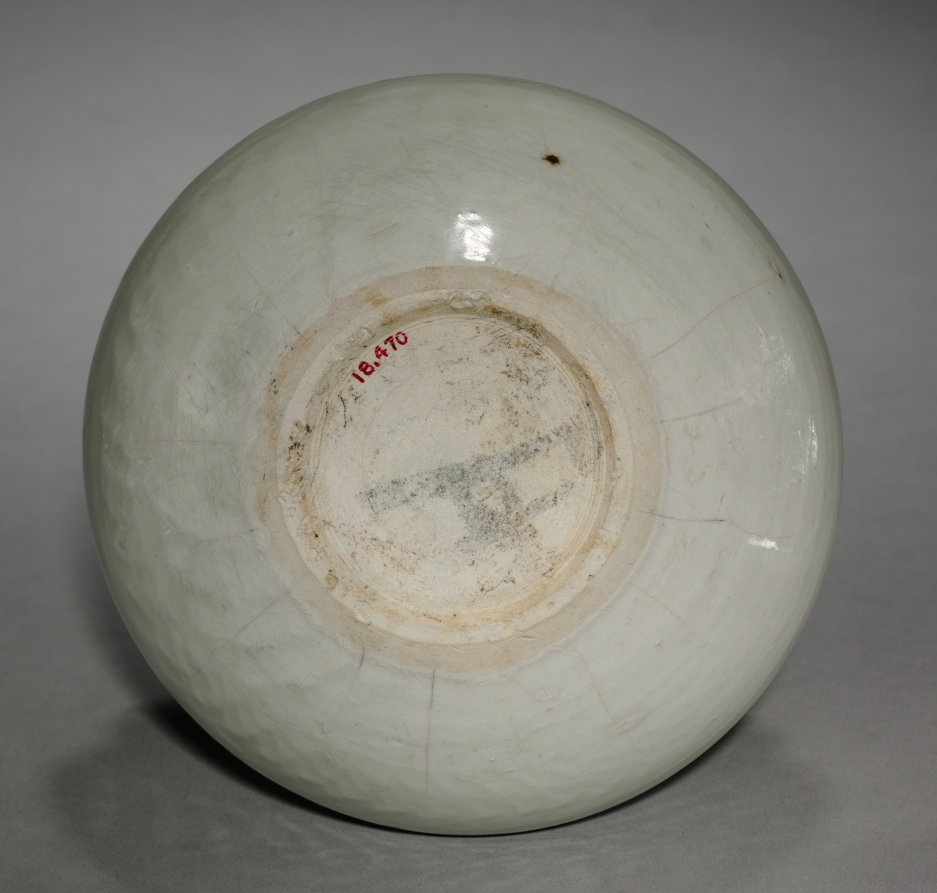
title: Bowl: Southern White Ware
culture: China, Tang dynasty (618-907) - Five dynasties (907-960)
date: late 800s-early 900s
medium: Glazed porcelain, Southern white ware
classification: Ceramic